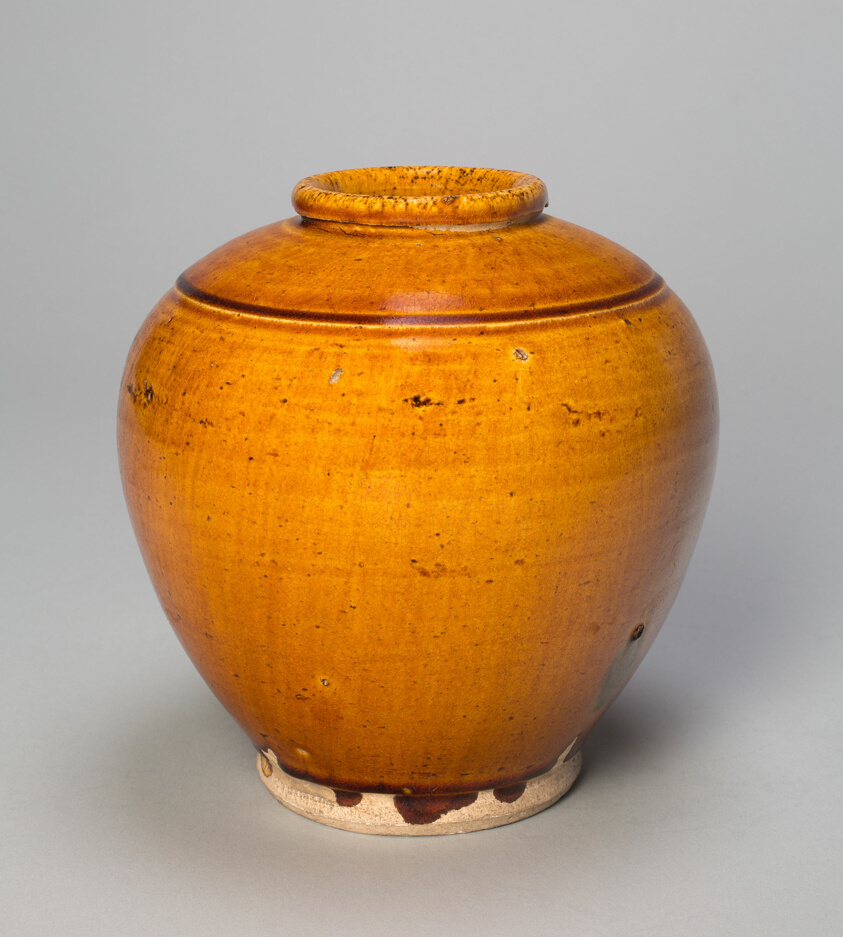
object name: Vessel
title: Globular Jar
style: Chinese (culture or style)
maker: China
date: Tang dynasty (618–906)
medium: Earthenware with amber glaze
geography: China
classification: earthenware; asian art; ceramics; vessel